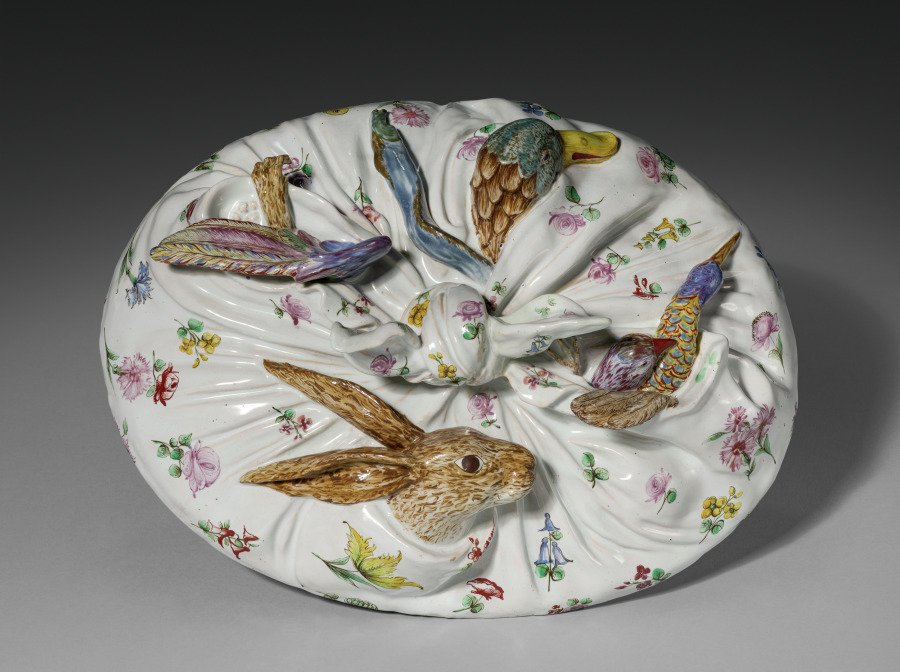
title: Cover for a Tureen in the Form of a Basket of Game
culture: France, 18th century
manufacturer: Sceaux Factory (French, active 1748–66)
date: c. 1755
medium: Tin- glazed earthenware (faience) wth enamel decoration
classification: Ceramic